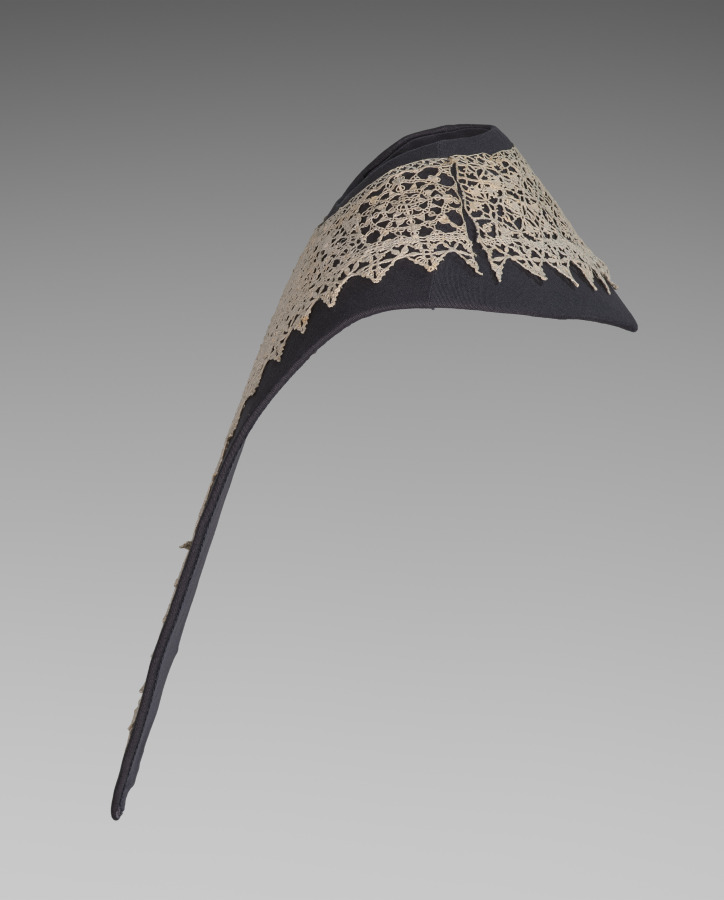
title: Lace Collar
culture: Italy, Genoa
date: 1560–1600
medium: Linen; needle lace (cutwork and reticella) and bobbin lace edging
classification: Lace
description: Large and small round motifs in a linear framework form this geometric design made in open cutwork, now known as reticella. Its fineness was cut from a linen cloth whose woven grid provided a firm ground for the embroiderer to build her lace. A similar design for open cutwork was published in a pattern book by Frederic de Vinciolo in Paris in 1587.